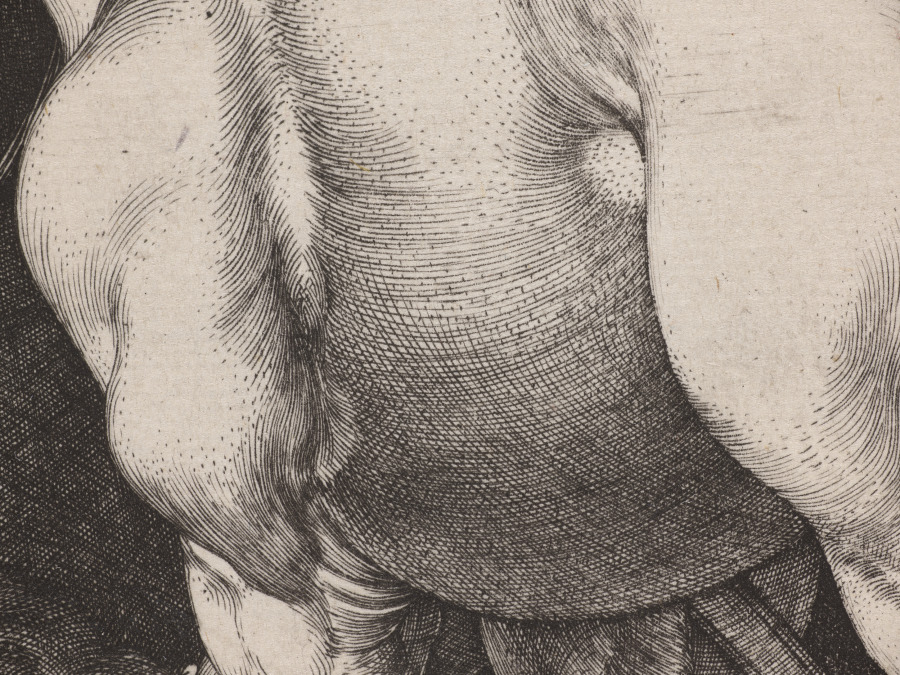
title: The Large Horse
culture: Germany, early 16th Century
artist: Albrecht Dürer (German, 1471–1528)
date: 1505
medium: engraving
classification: Print